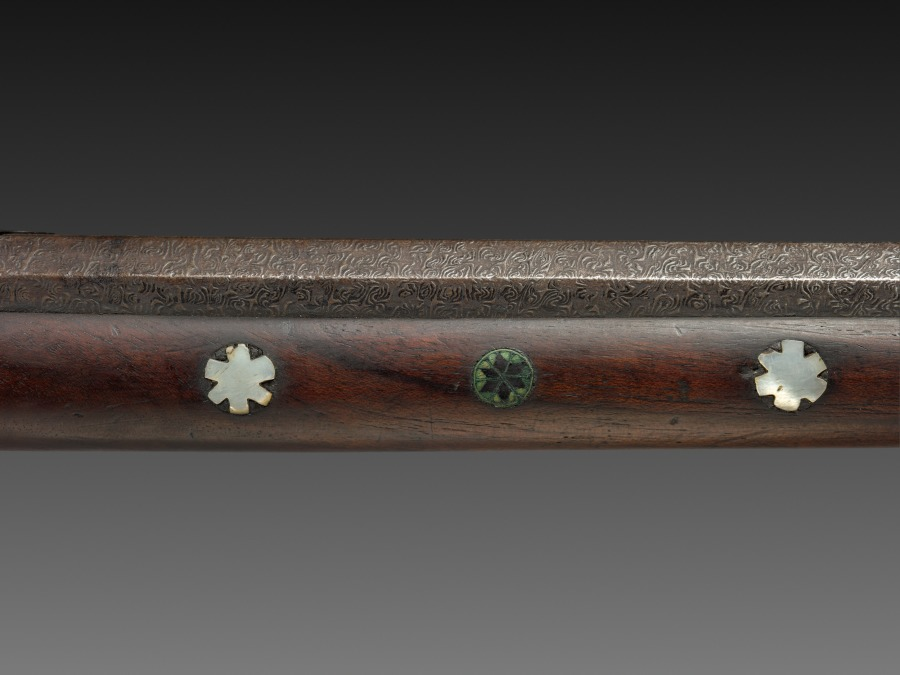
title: Matchlock Musket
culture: Turkey, Ottoman period (1299–1922)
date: c. 1750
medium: Wood, steel, brass, mother-of-pearl inlay, and leather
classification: Arms and Armor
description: Collectively, the Safavid, Mughal, and Ottoman empires are known as the Gunpowder Empires. Particularly from the 1500–1700s, they were among the strongest economic, cultural, and militaristic powers. Each trained and equipped their armies with the latest gunpowder firearms, particularly cannons and muskets. While used in battle, muskets were also used for leisure activities, particularly hunting. The decoration on this musket suggests it was a courtly item, fitted with a leather pad to protect the shooter from the force of the explosion after firing.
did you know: A matchlock musket was loaded from the muzzle end with a scouring stick kept in a sleeve on the underside of the barrel.